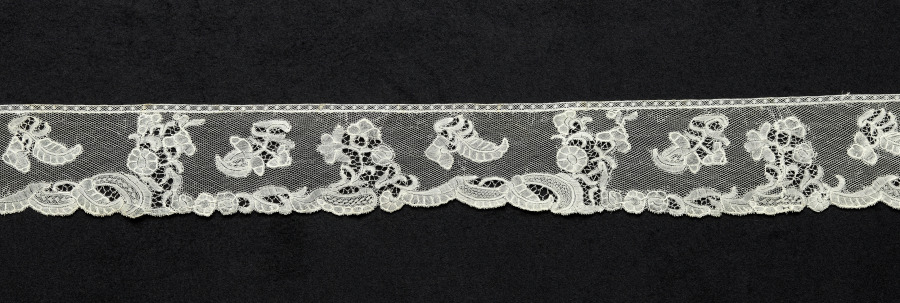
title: Lace Edging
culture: Belgium, Brussels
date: 1700s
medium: Linen: bobbin lace (Point d'Angleterre)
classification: Lace